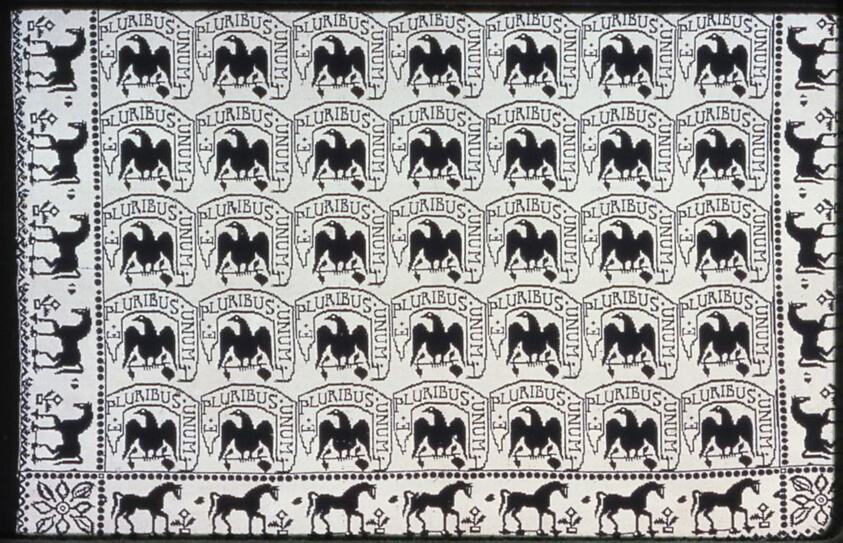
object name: Textile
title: Coverlet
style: 19th century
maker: United States, possibly Pennsylvania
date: c. 1840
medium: Wool and cotton, plain weave double cloth with main warp fringe; woven on loom with Jacquard attachment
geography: United States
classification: weaving - coverlet; coverlet; weaving; textile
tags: eagles, horses, floral motifs, patriotism, coverlet